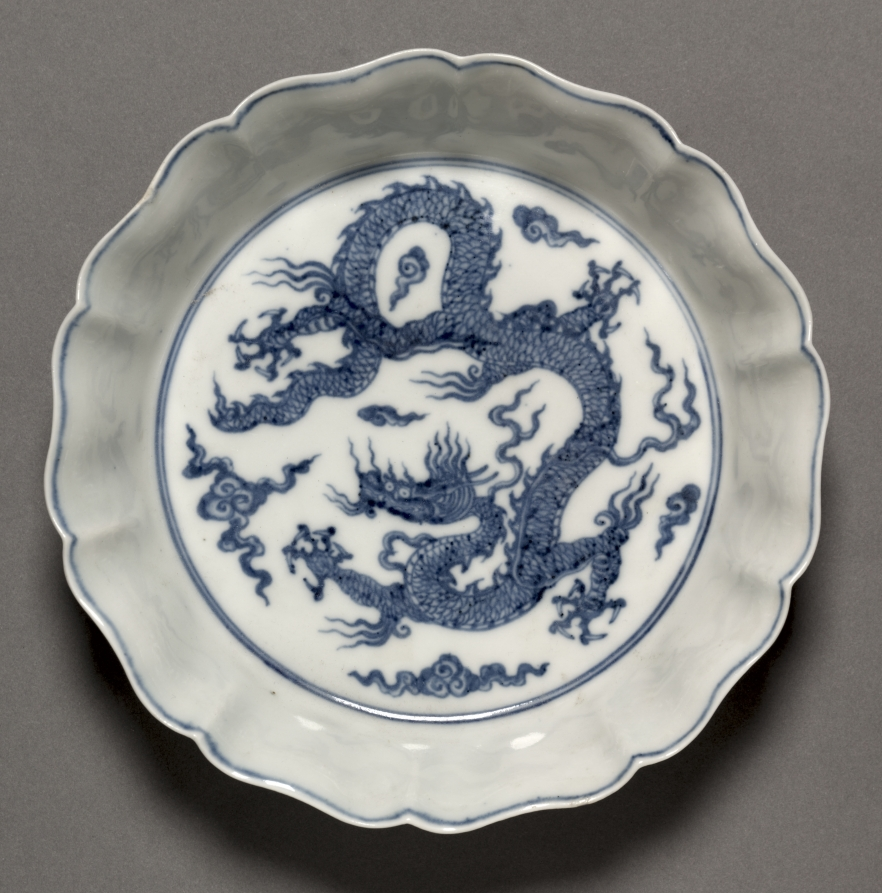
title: Brush Washer with Dragons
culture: China, Jiangxi province, Jingdezhen, Ming dynasty (1368-1644), Xuande reign (1426-35)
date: 1426–35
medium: porcelain with underglaze blue decoration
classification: Ceramic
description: The attractive tonal range found in the painted decoration, resulting from the irregular size of cobalt bits in the pigment, and the pocked glaze surface identify this stunning brush washer as a classic Xuande period piece despite the absence of a reign mark.